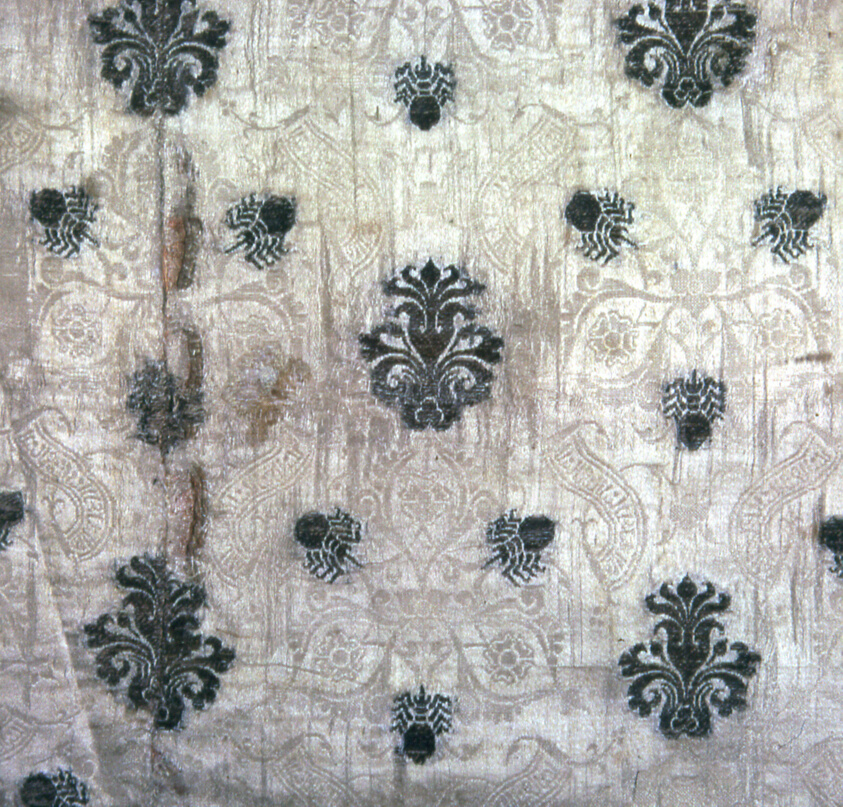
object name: Textile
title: Fragment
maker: Italy (Possibly Spain)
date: 1350–1400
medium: Silk and gilt-animal-substrate-wrapped linen, warp-float faced 4:1 satin weave with supplementary patterning and brocading wefts bound by secondary binding warps in plain and twill interlacings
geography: Italy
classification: textile; weaving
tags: coat of arms, royalty